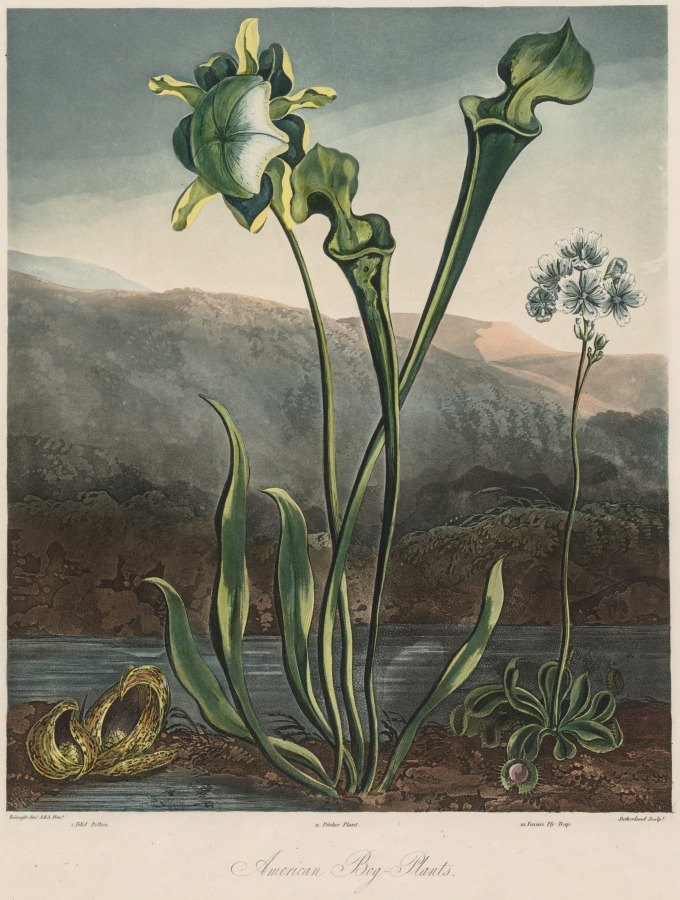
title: The Temple of the Flora: American Bog Plants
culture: England, 18th century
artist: Thomas Sutherland (British, 1785–1838)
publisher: Robert John Thornton (British, 1768–1837)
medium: color engraving, aquatint, stipple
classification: Print